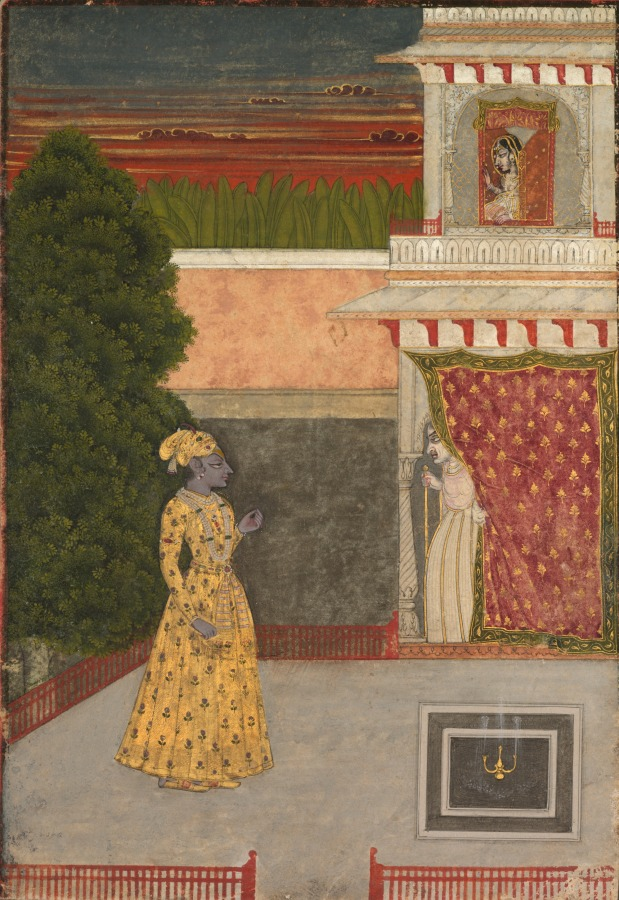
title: Lovers and an Old Crone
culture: Northwestern India, Rajasthan, Kishangarh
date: c. 1780–90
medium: color on paper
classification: Painting